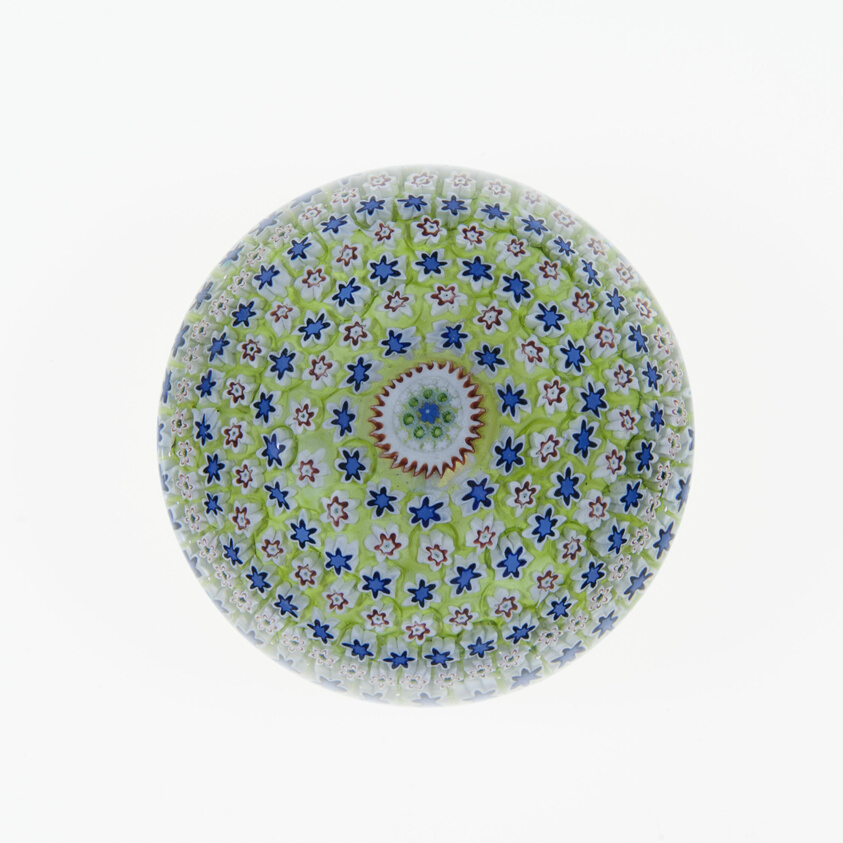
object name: Glass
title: Paperweight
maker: Saint-Louis Glassworks (Cristalleries de Saint-Louis); Lorraine, France, founded 1586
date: 19th century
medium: Glass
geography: Saint-Louis-lès-Bitche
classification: paperweight; millefiori; european decorative arts; glass